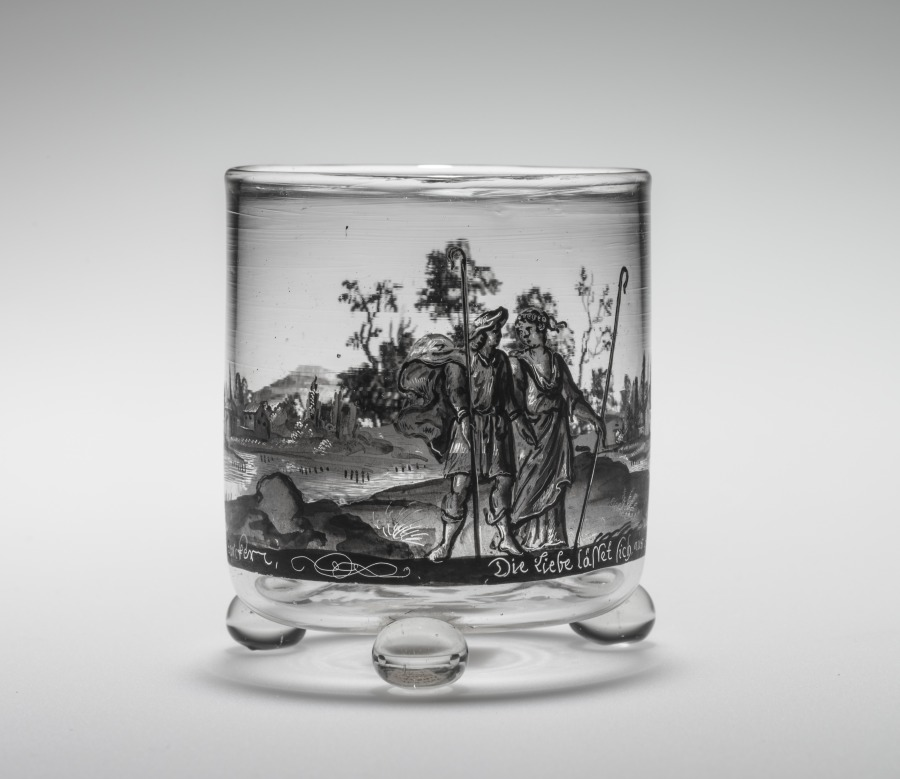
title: Tumbler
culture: Germany, Nuremberg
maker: attributed to Johann Schaper (German, 1635–1670)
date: 1670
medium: glass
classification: Glass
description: Johann Schaper (1621-1670) was a German painter of stained glass, mainly working in Nuremberg and Regensberg, who later turned to decorating glass and ceramics from his home, typical of artisans in the 17th century (hausmaler). His style was mainly a linear one in the manner of engravings, and often he worked in black (schwarzlot) or dark colors. Schaper was so influential that other artisans tried to copy his technique, in which he scratched out details with a needle, with varying degrees of success.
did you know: The fine details of the decoration on this tumbler were achieved by scratching away the enamel with a needle.